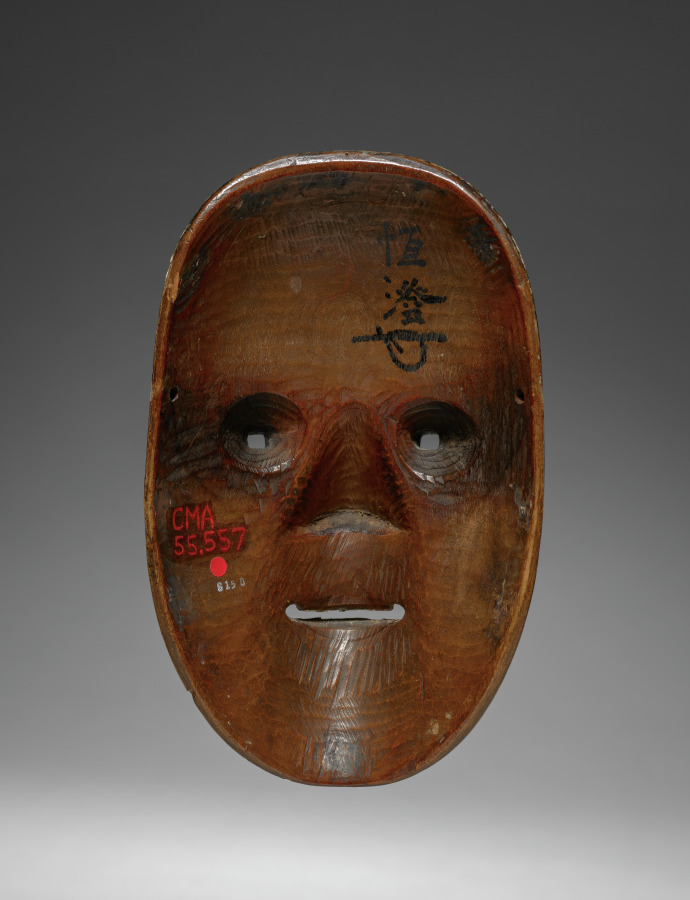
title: Noh Mask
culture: Japan, Edo period (1615–1868)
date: c 1700s- 1868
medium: carved wood, pigment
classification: Wood